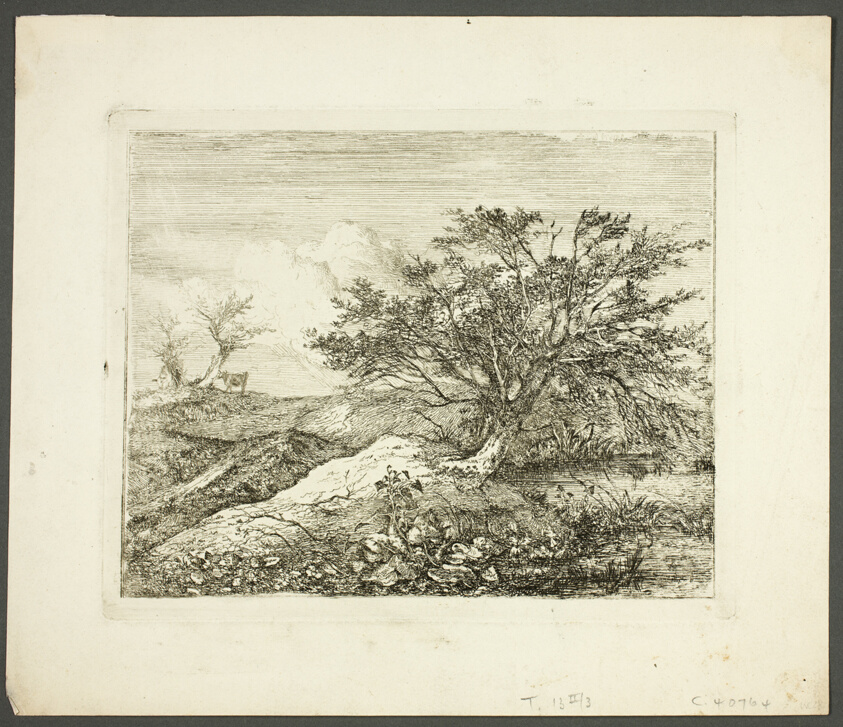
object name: Print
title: At Bawburgh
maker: John Crome (English, 1768-1821)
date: 1813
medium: Etching on ivory wove paper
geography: England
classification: etching; print; prints and drawing